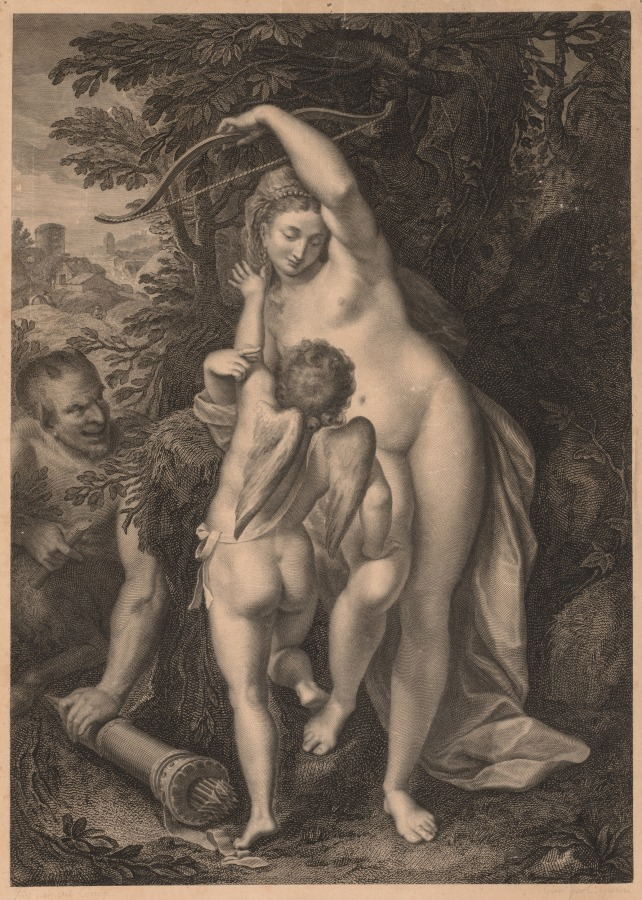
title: L'Amour desarme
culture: France, 18th-19th century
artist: Christophe Guerin (French, 1758–1831)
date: c. 1780–1831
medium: engraving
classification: Print